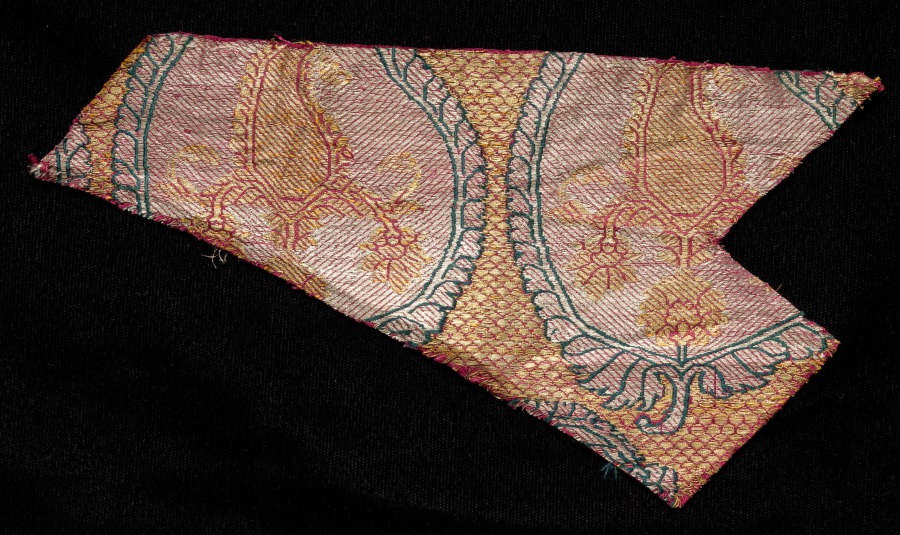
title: Brocade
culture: India, Benares, 19th century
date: 1800s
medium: brocade, "kimkhwab"; silk with metal ground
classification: Textile